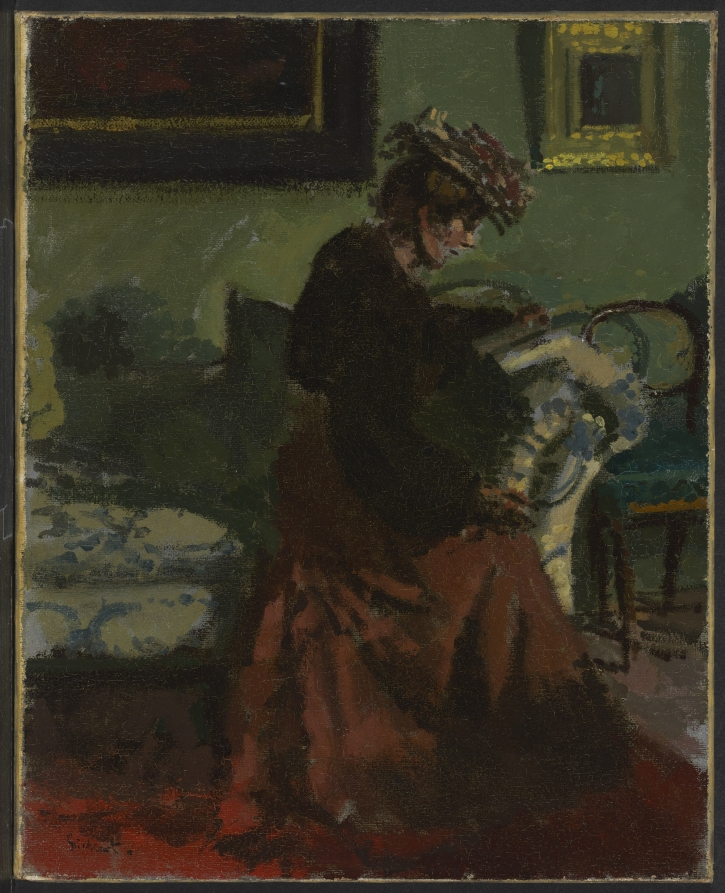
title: Easter Monday-Hélène Daurmont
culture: England, 20th century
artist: Walter Sickert (British, 1860–1942)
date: 1906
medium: oil on canvas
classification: Painting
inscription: Signed lower left: "Sickert"